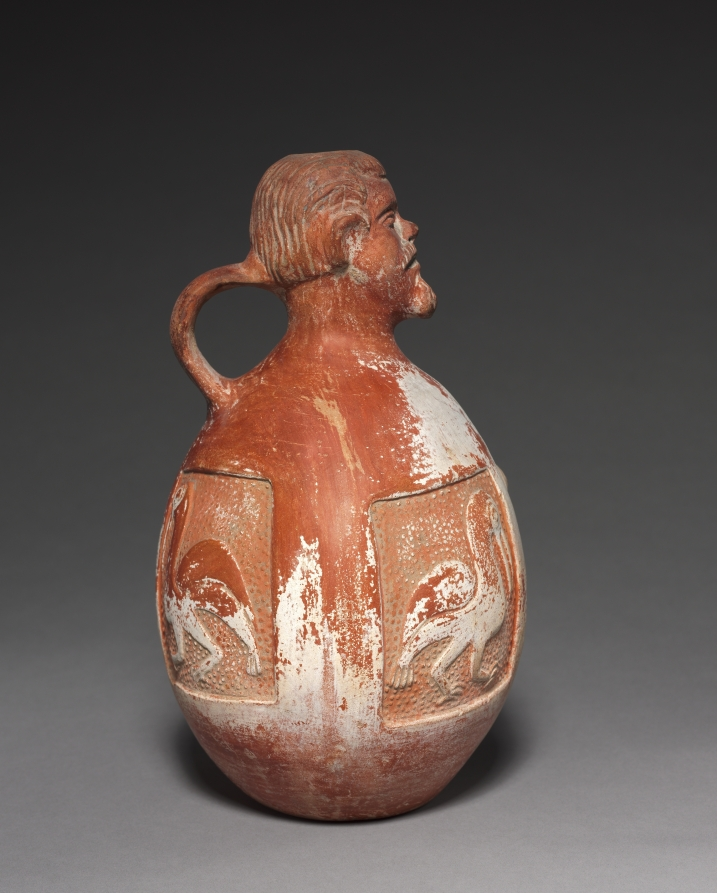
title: Urn or Jug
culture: Peru, 16th century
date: 1532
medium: pottery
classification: Ceramic